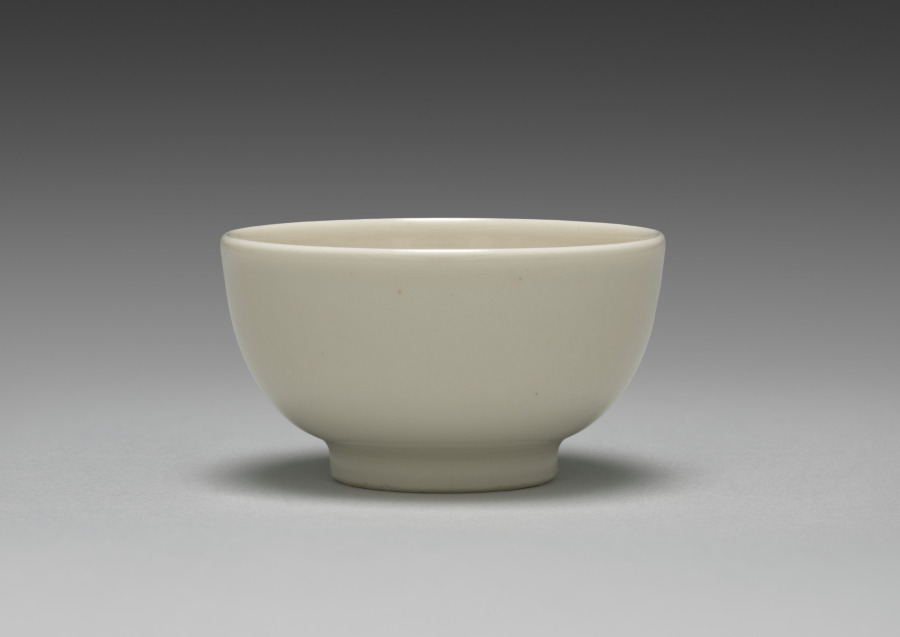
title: Sake Cup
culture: Japan, Meiji period (1868–1912)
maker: Seifū Yohei III (Japanese, 1851–1914)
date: c. 1893–1914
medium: porcelain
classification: Ceramic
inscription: 清風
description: Seifū Yohei III was the first ceramist to be designated an Imperial Household Artist, a position that came with an annuity. He was tasked with producing items need by the imperial household to decorate the Meiji Palace and to present to state guests as gifts.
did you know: There are subtle bamboo leaflike shapes on the interior of the sake cup.